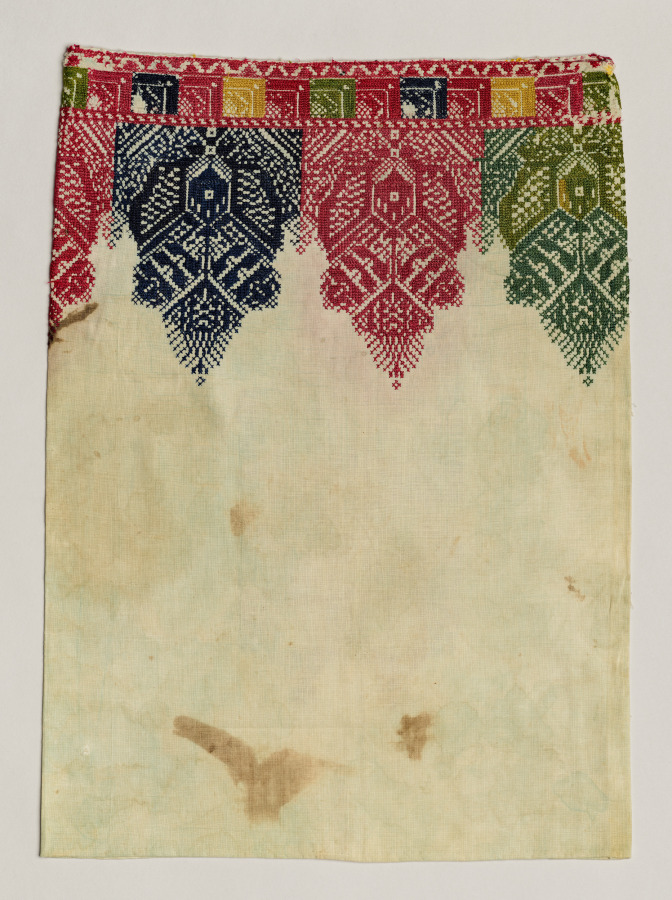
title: Furnishing textile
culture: Africa, North Africa, Morocco, Meknès, Moroccan embroiderer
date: 1800s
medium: Cotton, silk, dye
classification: Embroidery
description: This densely embroidered textile from Meknès, Morocco was possibly used as a pillow cover.